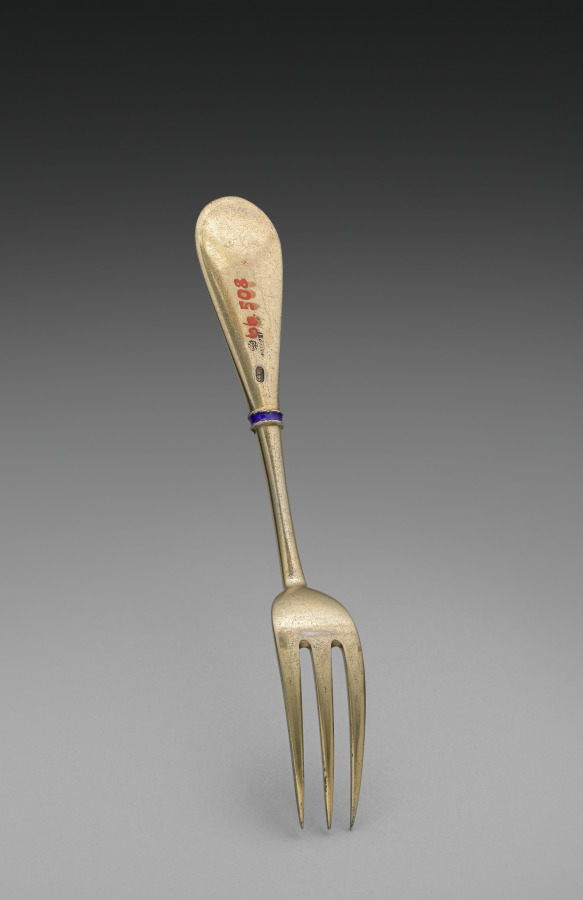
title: Cake Fork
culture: Russia, St. Petersburg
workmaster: attributed to Feodor Ivanovich Rückert (Russian, 1840–1917)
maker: House of Fabergé (Russian, 1842–1918)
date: 1887–96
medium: silver gilt, opaque cloisonné enamel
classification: Miscellaneous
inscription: 84, St. George [assay mark for Moscow, 1882-1896]; C. Fabergé (in Cyrillic); double-headed eagle [imperial warrant]; 11494 scratched.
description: Fabergé’s craftsmen in Moscow, especially under the watchful eye of workmaster Feodor Rückert, became known for their work in the pan-Slavic or neo-Russian style, hearkening back to 17th-century motifs of Russian folk art. Often on rather conventional shapes, Rückert and his silversmiths created an explosion of color, achieved through the historic technique of cloisonné enamel in which tiny metal lines are soldered to the surface then filled with glass powders in various colors and fired to create a high gloss finish. The result is a spectacular evocation of the 17th-century originals. Far from mere copies, however, Rückert's designs, such as this tea service, employ naturalistic or abstract motifs in a thoroughly modern adaptation of a remarkable earlier period of Russian art and decoration.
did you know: This cake fork is part of a larger tea service.